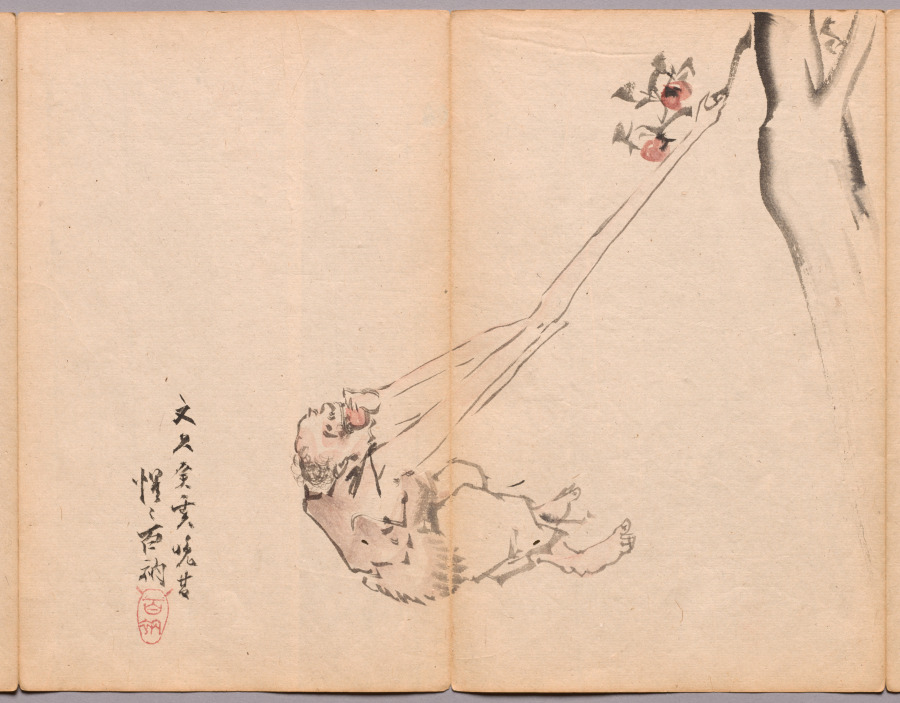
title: Long-arms Snatching Fruit from Sketch Book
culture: Japan, Edo period (1615–1868) to Meiji period (1868–1912)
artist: Kawanabe Kyōsai (Japanese, 1831–1889)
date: mid- to late 1800s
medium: Accordion-style book of 26 double-leaves; ink and color on paper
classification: Bound Volume